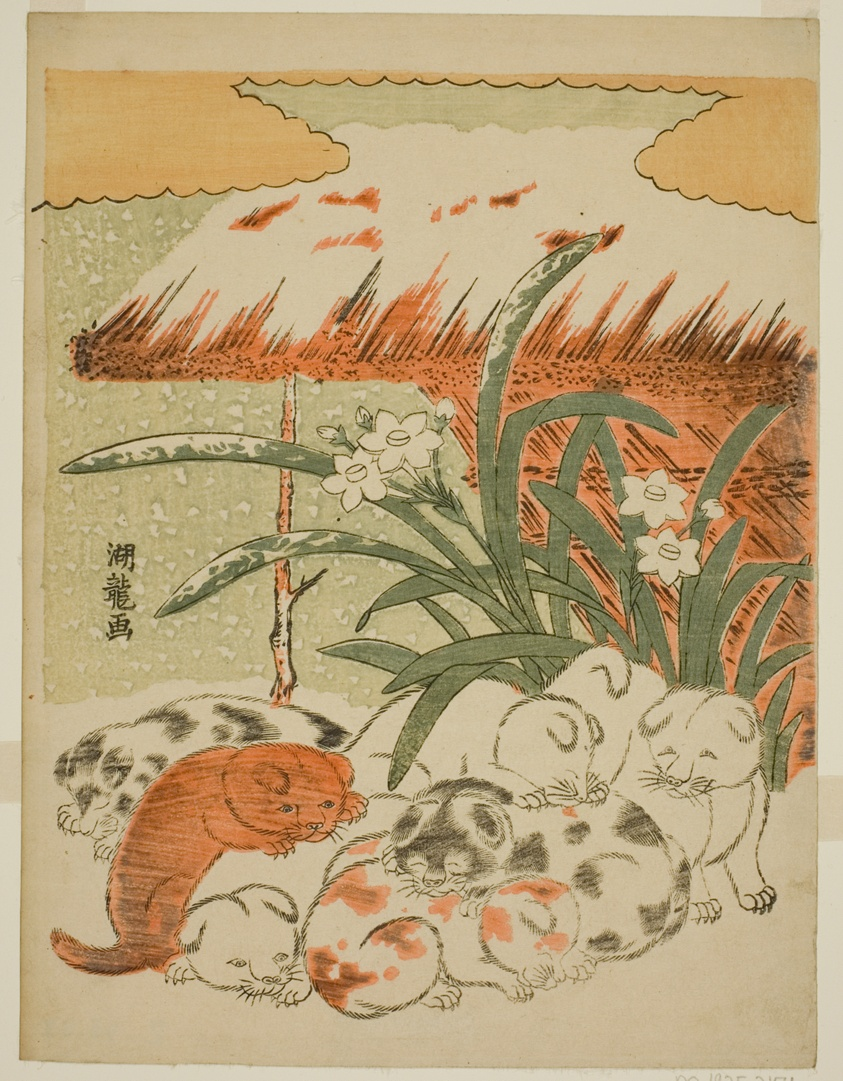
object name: Print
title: Puppies in the Snow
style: Japanese (culture or style)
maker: Isoda Koryusai (Japanese, 1735-1790)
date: c. 1773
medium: Color woodblock print; chuban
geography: Japan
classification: woodblock print; print; asian art